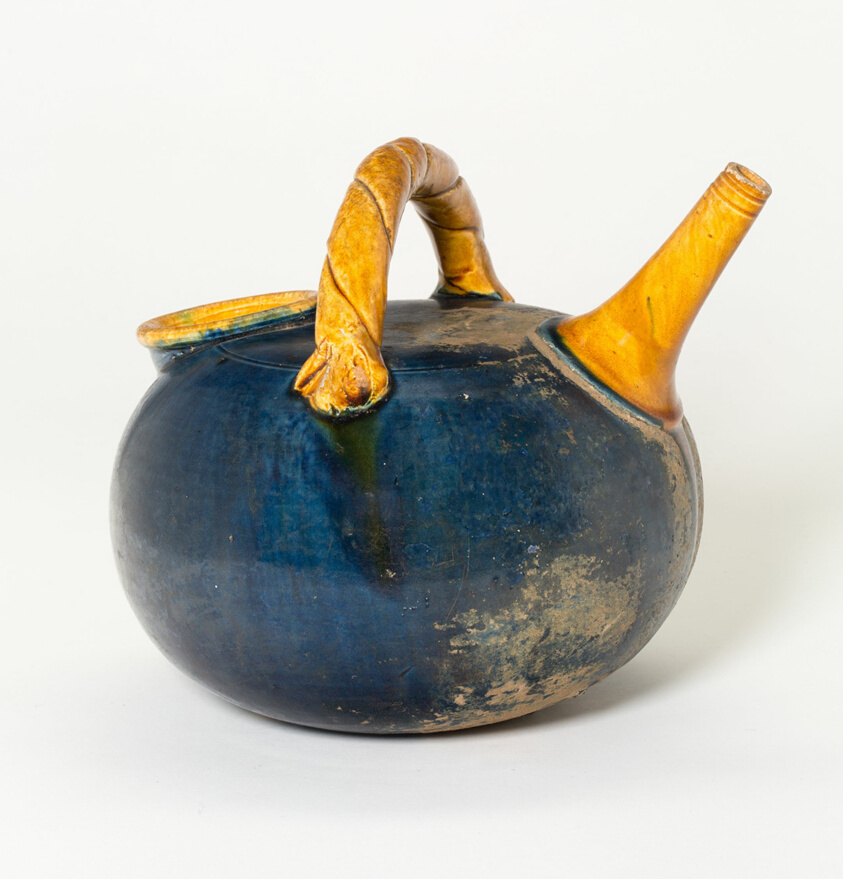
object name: Vessel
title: Spouted Ewer with Twisted Rope Handle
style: Chinese (culture or style)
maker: China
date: Possibly Liao dynasty (907–1125)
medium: Earthenware with brown and blue lead glazes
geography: China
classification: ewer (vessel); vessel; earthenware; ceramics; asian art